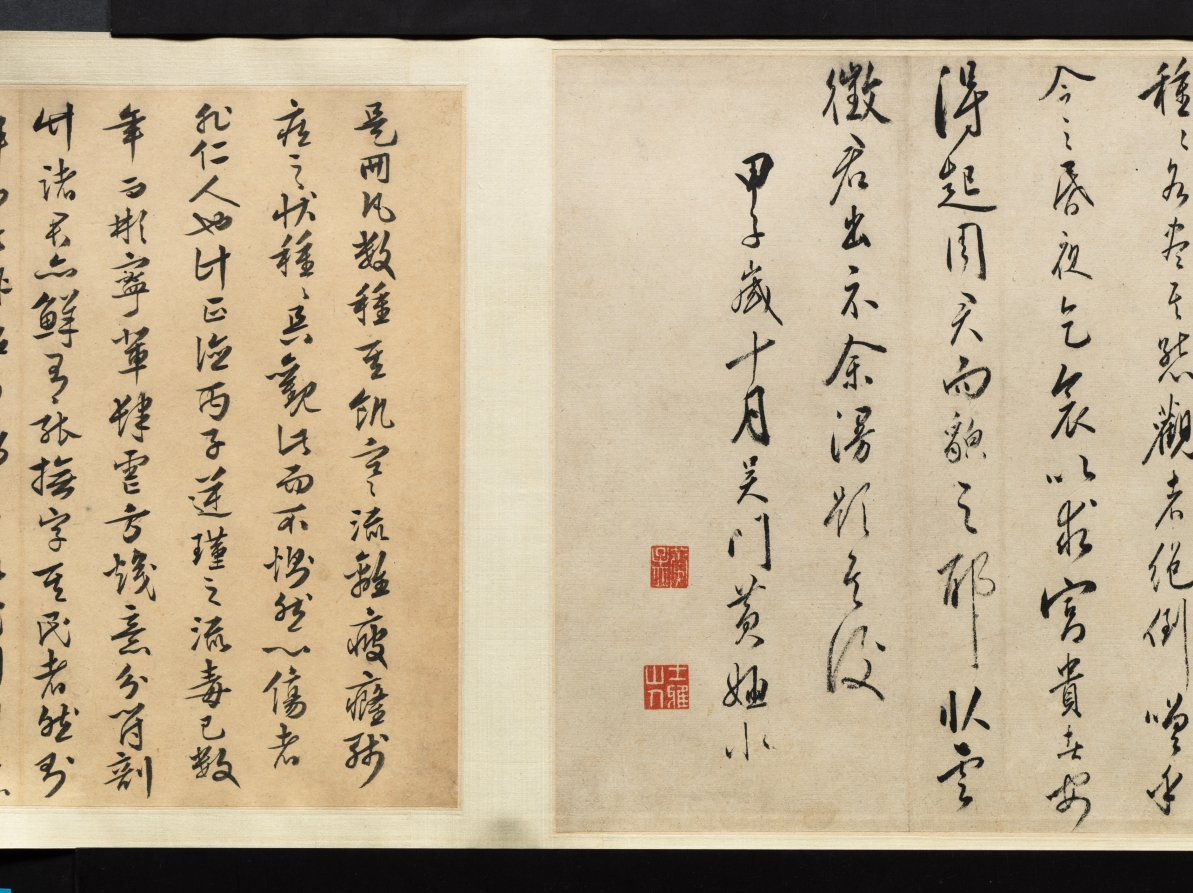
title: Beggars and Street Characters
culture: China, Ming dynasty (1368–1644)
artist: Zhou Chen (Chinese, c. 1450–c. 1536)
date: 1516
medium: Handscroll; ink and light color on paper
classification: Painting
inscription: 題: 周臣流氓圖. 古堇趙鶴琴 [印] 老鶴臨池; 鵝池軒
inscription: 正德丙子秋七月，閒窗無事 ，偶記素見市道丐者種種態度。乘筆硯之便，率爾圖寫。雖無足觀，亦可以助警勵世俗云。 東邨周臣記 [印]東邨; 舜卿; 鵝場散人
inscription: 吳中東邨周君，善丹青，尤長於人物。此圖其所見盛市丐者之狀種種，各盡其態，觀者絕倒。嗟乎，今之晝夜乞哀以求富貴者，安得起周君而貌之耶。臥雲徵君出示，余漫題其後。 甲子歲十月吳門黃姬水 [印] 士雅山人; 另一印不詳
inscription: 是冊凡數種。其飢寒流離疲癃殘疾之狀，種種之異。觀此而不惻然心傷者，非仁人也。計正德丙子逆瑾之流毒已數年。而[江]彬 [錢] 寧輩肆虐方熾。意分符剖竹諸君，亦鮮有能撫字其民者。然則舜卿此作，殆與鄭君 流民圖同意。其有補於治道者不淺，要不可以墨戲忽之也。 長洲張風翼題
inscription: 東村此筆，蓋圖寫飢寒乞丐之態，以警世俗耳。而質山 [黃姬水]欲其寫昏夜乞哀，而靈墟[張鳳翼]則擬之於安上門圖。二君之見，其各有所指哉。昔唐六如每見周筆，輒稱曰：周先生！蓋深服其神妙之不可及。若此冊者，信非他人可能而有符於六如之心伏矣。豈易得耶。若黃、張之指，則又論於畫之外，不在於形似筆墨之旨也。 萬歷丁丑十二月三日 茂苑文嘉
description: Zhou Chen from Suzhou provides rare depictions of impoverished people that once filled the city’s markets and streets. Despite Suzhou’s prosperity, its rapid growth polarized society, including the wealthy and those who had deserted their farmlands, who were without homes, unemployed, or sick. Amid these are figures who inspire fear rather than empathy. The painting may thus be informed by local practices at the end of the lunar year, in which street beggars, in exchange for food or money, would dress up like ghosts and demons to drive out evil forces.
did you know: Although Zhou Chen's original composition was an album of 24 figures, today it is mounted as two handscrolls, one in the Cleveland collection and one in the Honolulu Museum of Art.